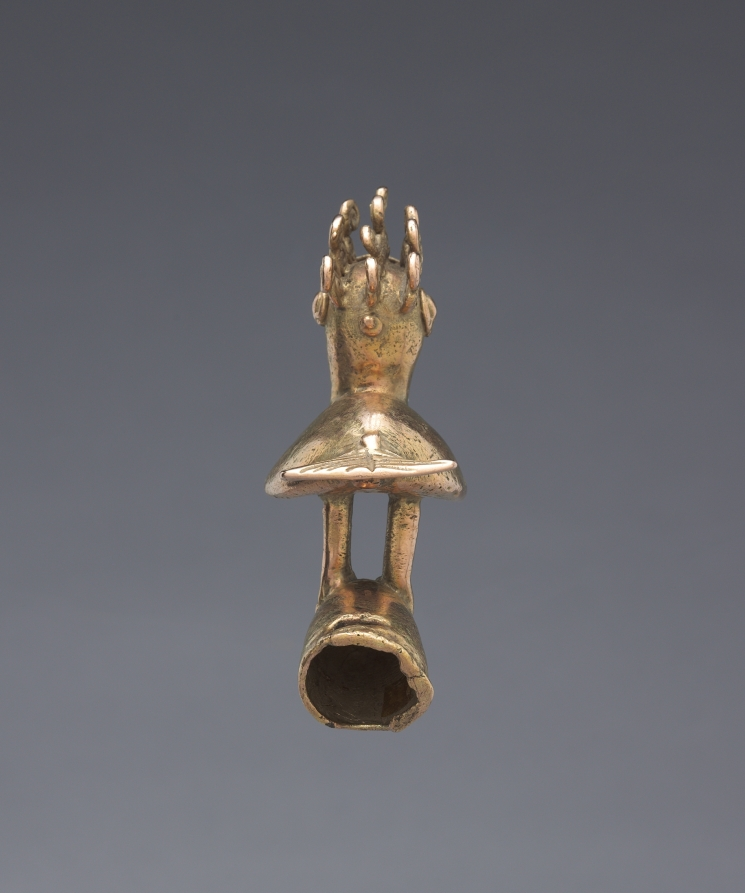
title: Staff Head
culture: Colombia, Sinú style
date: 400–1000 CE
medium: cast gold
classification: Metalwork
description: These finials probably fit over the ends of wooden staffs, emblems of rank. Unique to the Sinú area are finials with an image, often a bird, at a right angle to the base. This orientation suggests that the finials served as the finger grips of ceremonial spear throwers.